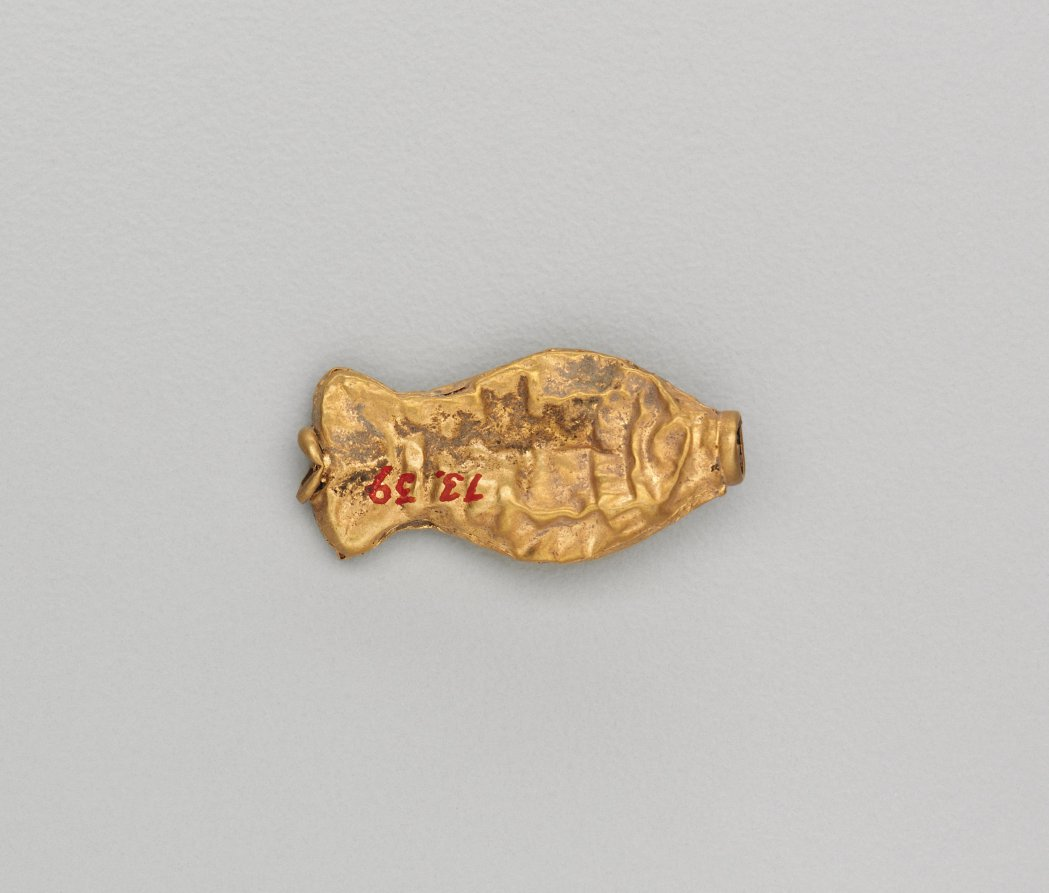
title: Necklace Bead in the Form of a Fish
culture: India, Shunga period (185–78 BCE)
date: 185–72 BCE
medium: gold repoussé with granulation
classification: Jewelry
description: Jewelry in ancient India often consisted of elements associated with water, such as fish and other aquatic plants and animals. Since water is essential for life, imagery that connotes water is life-affirming, or auspicious, and therefore appropriate adornment.